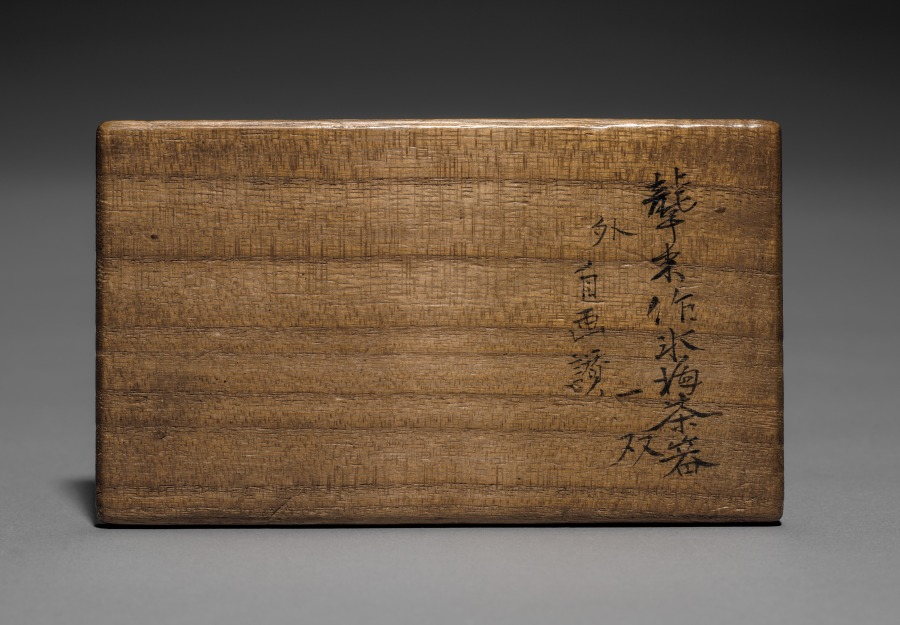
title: Pair of Tea Containers with Plum Blossoms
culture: Japan, Edo period (1615–1868)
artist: Aoki Mokubei (Japanese, 1767–1833)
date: early 1800s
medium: porcelain with underglaze blue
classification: Ceramic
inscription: signed "Ro Mokubei" on base in underglaze blue.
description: Aoki Mokubei, born into a family of restaurateurs, was a potter, calligrapher, painter, and scholar, and is considered one of the three masters of later Edo period Kyoto ceramics. He specialized in porcelains fashioned after Chinese prototypes, and created works for steeped tea (sencha) such as these matching tea caddies decorated in an underglaze blue called sometsuke—literally “with applied dye.” He signed them on their bottoms. They also have intricately patterned silk sleeves to both beautify and protect them. On the exterior of the lid of the outer wooden box that contains them, it is written that Mokubei inscribed and painted an image on the box. On the interior of the lid, the signature and seals of a former owner are written. Mokubei has signed the lid of the inner box, and a charming ink and light color composition of West Lake in Hangzhou in China covers its three sides. On the fourth side is a long inscription by Mokubei describing the scene.